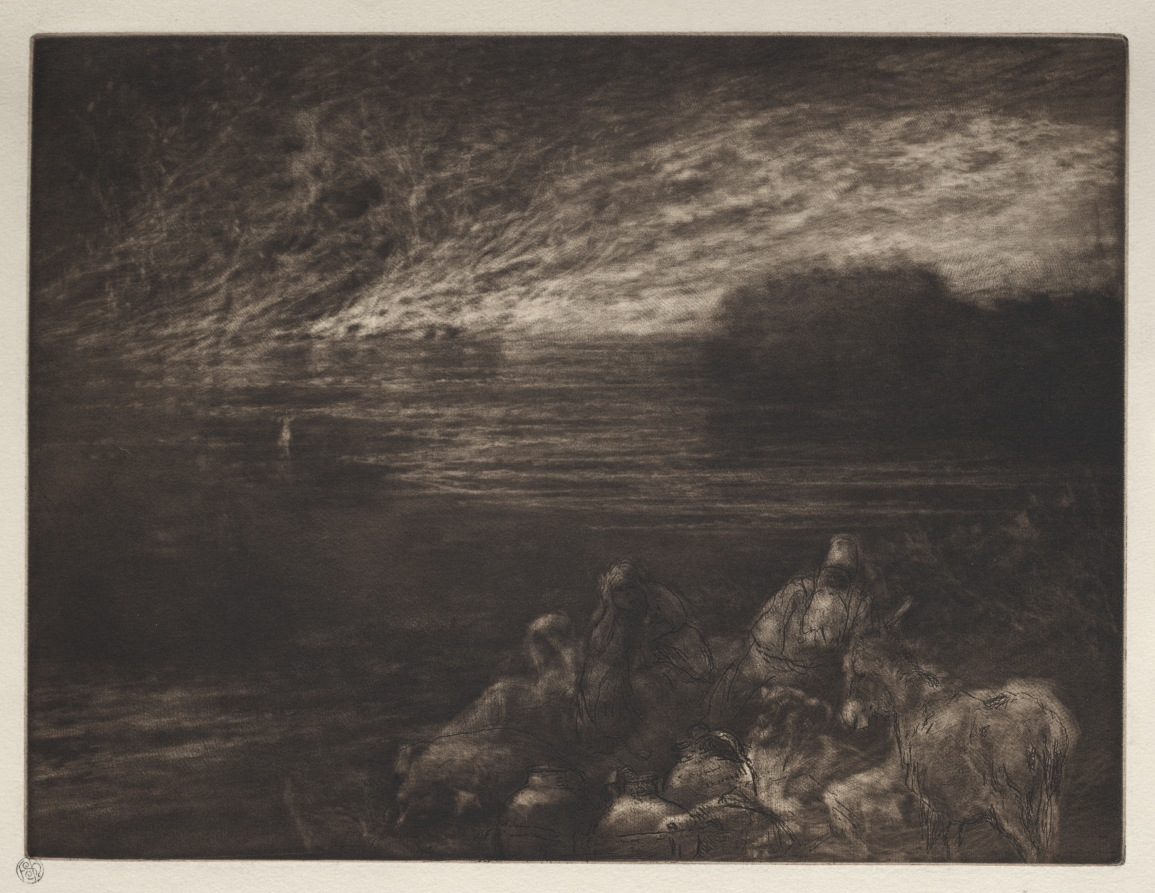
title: The Pillar of Salt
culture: England, 19th century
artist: Francis Seymour Haden (British, 1818–1910)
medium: etching and mezzotint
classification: Print